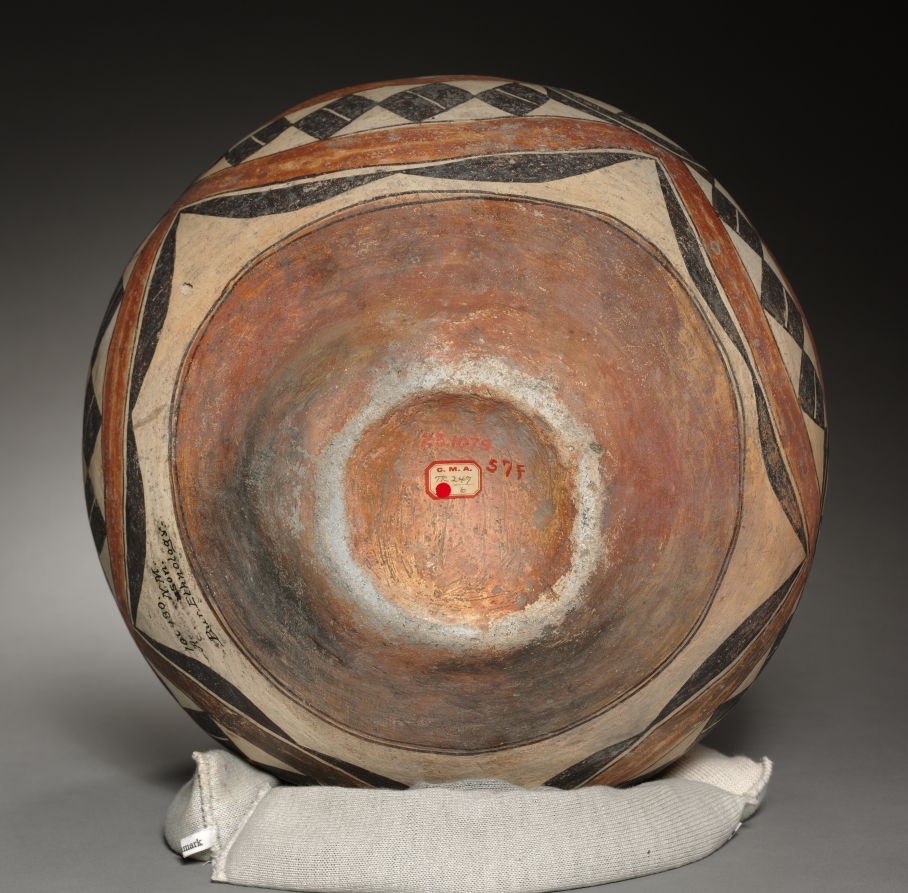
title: Jar (Olla)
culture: Southwest, Pueblo, Acoma, Laguna, Post- Contact Period,19th century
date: 1875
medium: pottery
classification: Ceramic